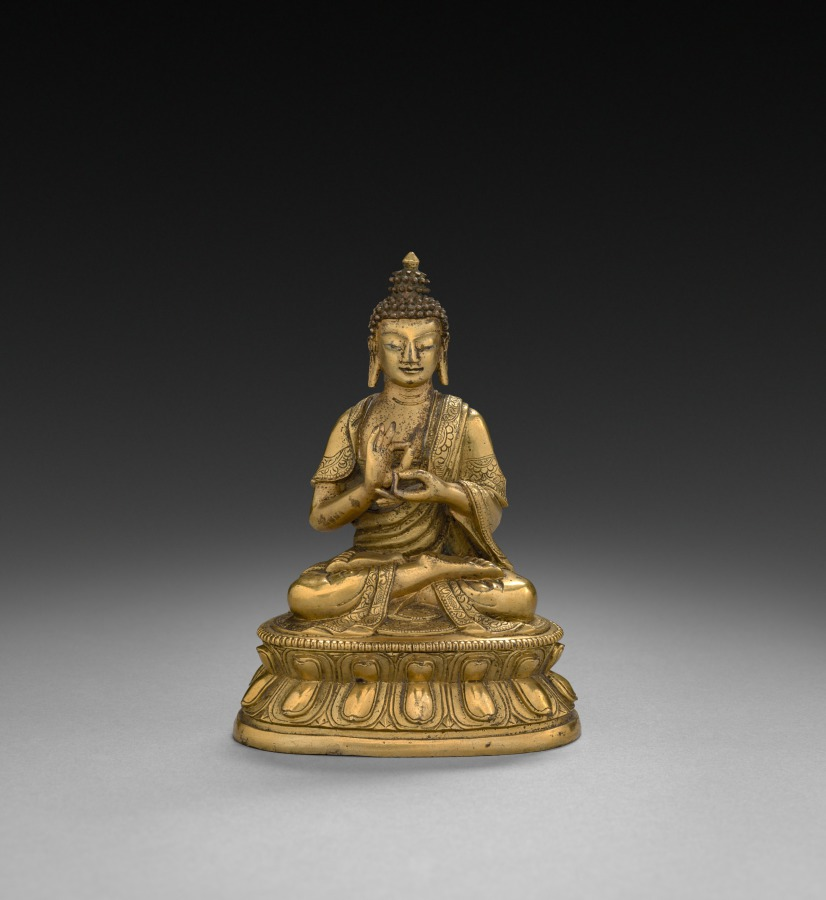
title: Seated Buddha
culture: China, Ming dynasty (1368–1644)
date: 1500s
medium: gilt bronze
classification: Sculpture